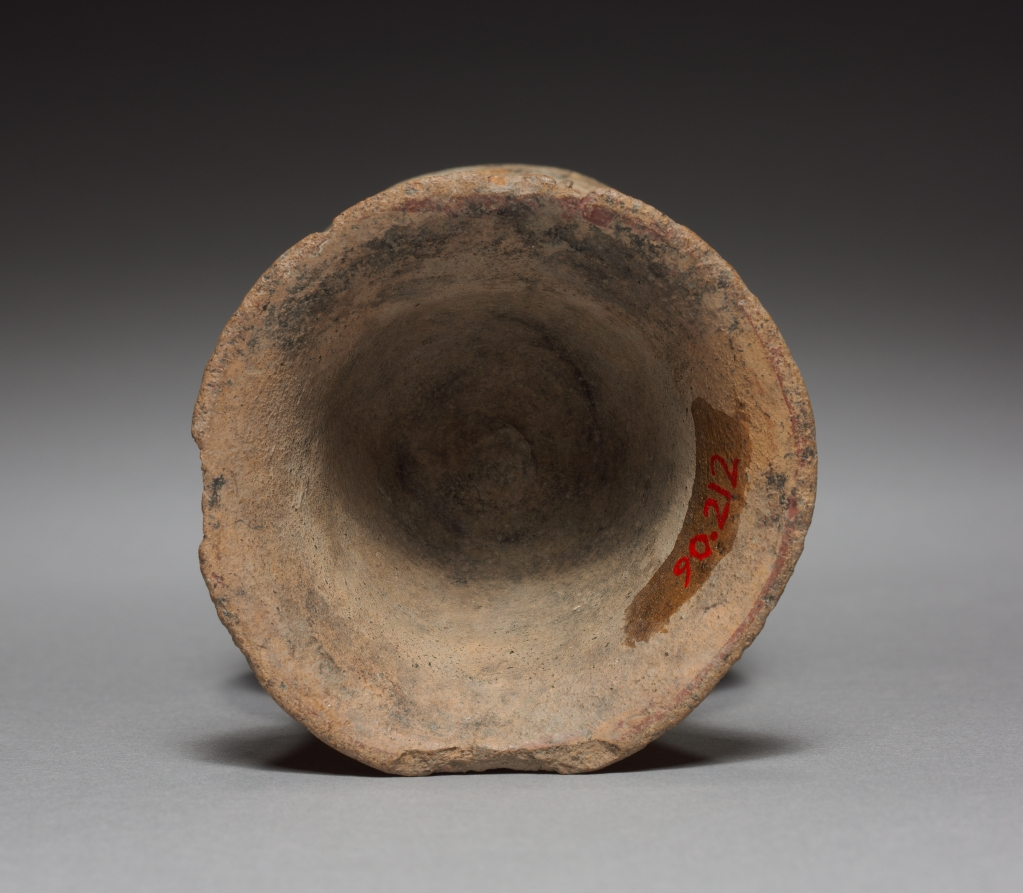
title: Drinking Cup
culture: Mexico, Cholula(?), Mixteca-Puebla style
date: 900–1519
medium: pottery with burnished, colored slips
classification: Sculpture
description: After about the year 800, several Mixtec kingdoms developed in the regions known today as Oaxaca and Puebla in southern Mexico. Mixtec artists excelled in creating small-scale, fine works of art, including polychrome pottery. A Mixtec noble may have used this well-painted goblet to drink chocolate or pulque, a fermented beverage made from the sap of the maguey cactus.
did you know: Pulque, once the drink of gods and rulers, is now available in a can.